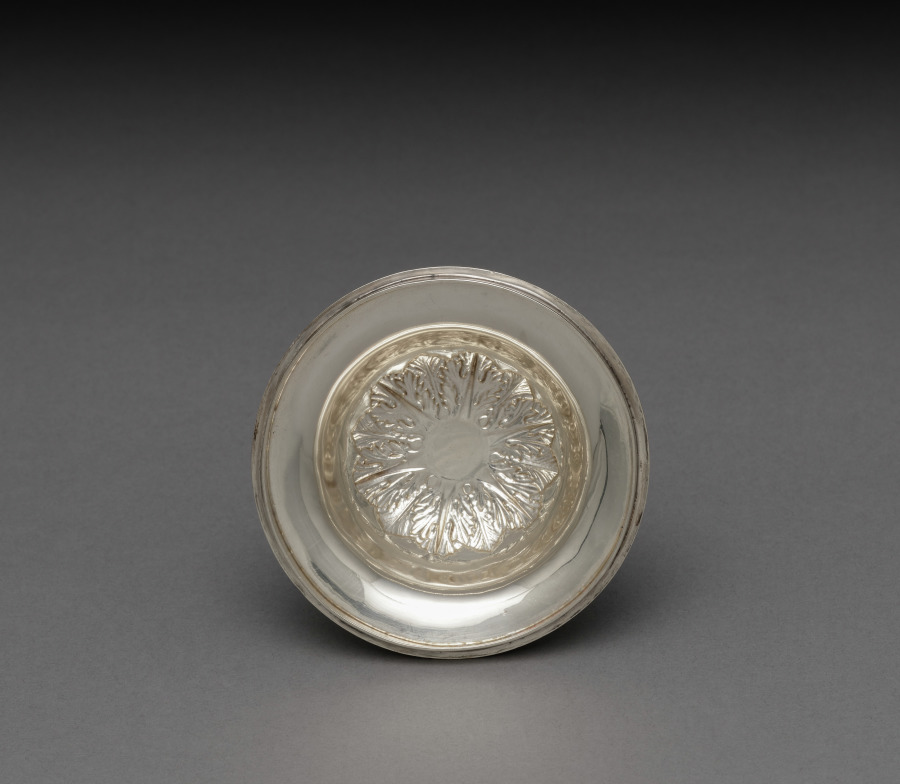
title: Sugar Urn with Cover (lid)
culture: America, Pennsylvania, Philadelphia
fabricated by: Harvey Lewis (American, 1835)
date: c. 1811–25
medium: silver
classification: Silver